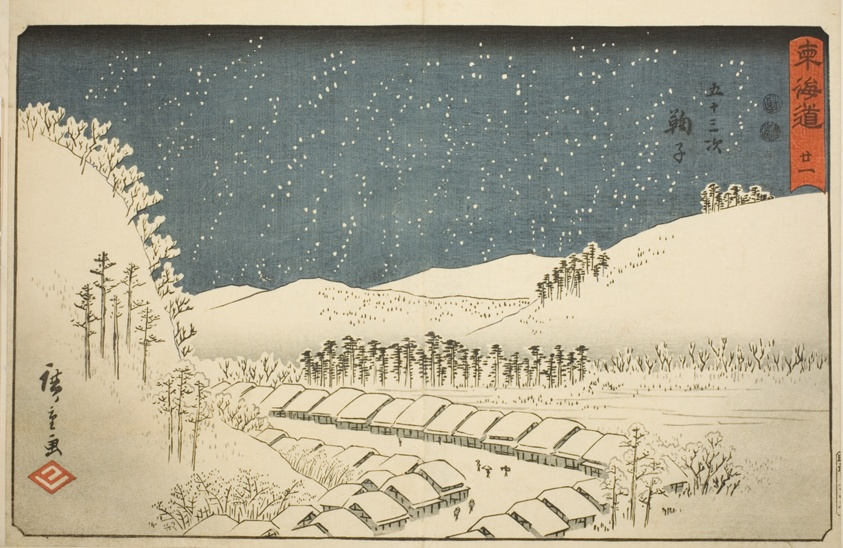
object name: Print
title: Mariko—No. 21, from the series "Fifty-three Stations of the Tokaido (Tokaido gojusan tsugi)," also known as the Reisho Tokaido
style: Japanese (culture or style)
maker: Utagawa Hiroshige 歌川 広重; Japanese, 1797–1858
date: c. 1847/52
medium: Color woodblock print; oban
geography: Japan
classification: woodblock print; print; asian art